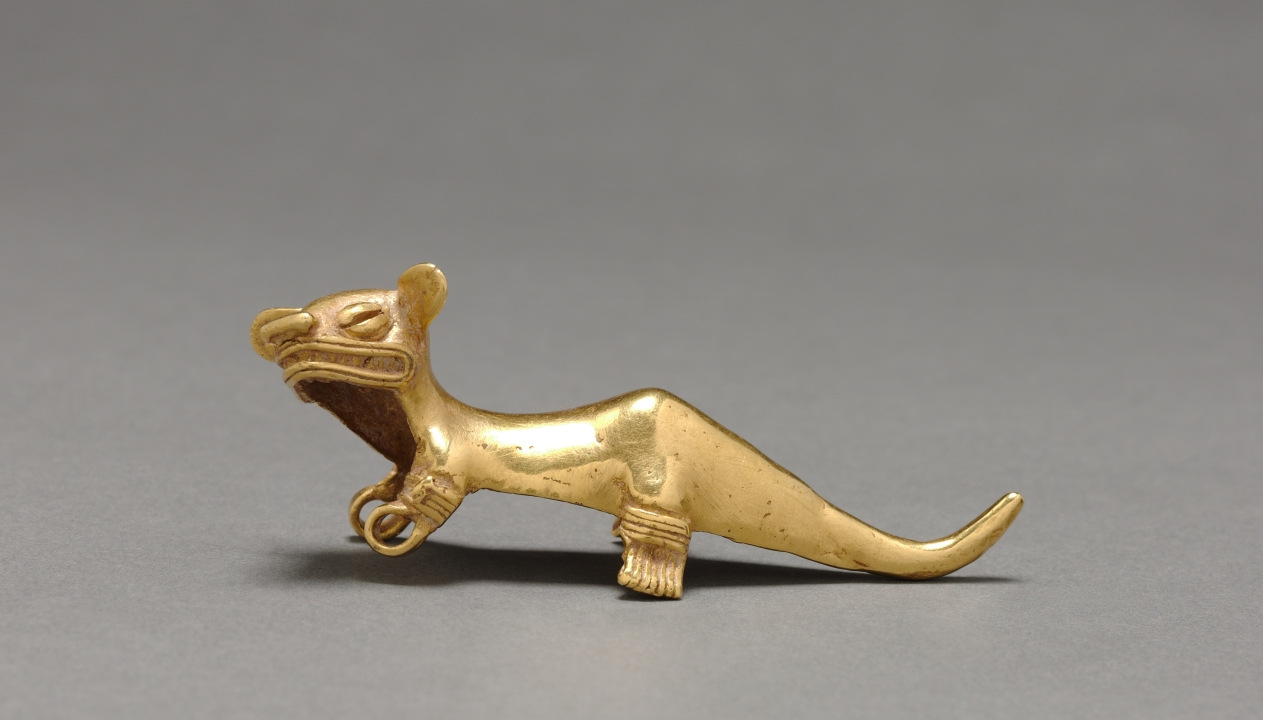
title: Feline Pendant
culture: Western Panama, Veraguas-Gran Chiriquí Style, 10th-16th century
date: c. 1000–1550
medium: cast gold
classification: Metalwork